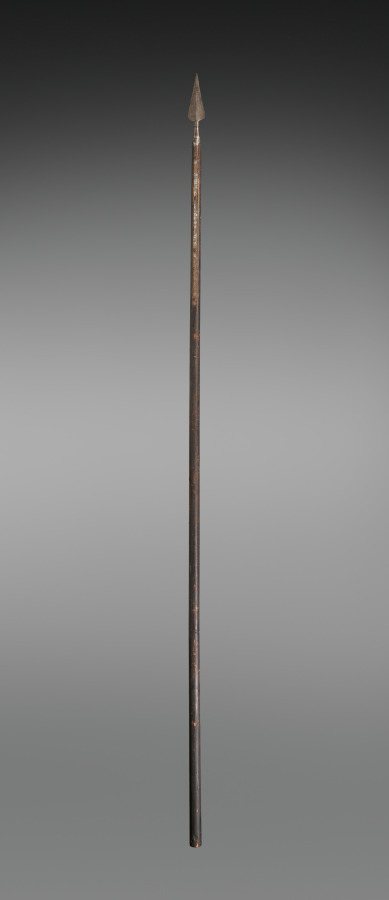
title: Banner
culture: Switzerland, Savoyard, 17th century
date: 1600s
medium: silk ground, small steel lance head on shaft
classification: Arms and Armor